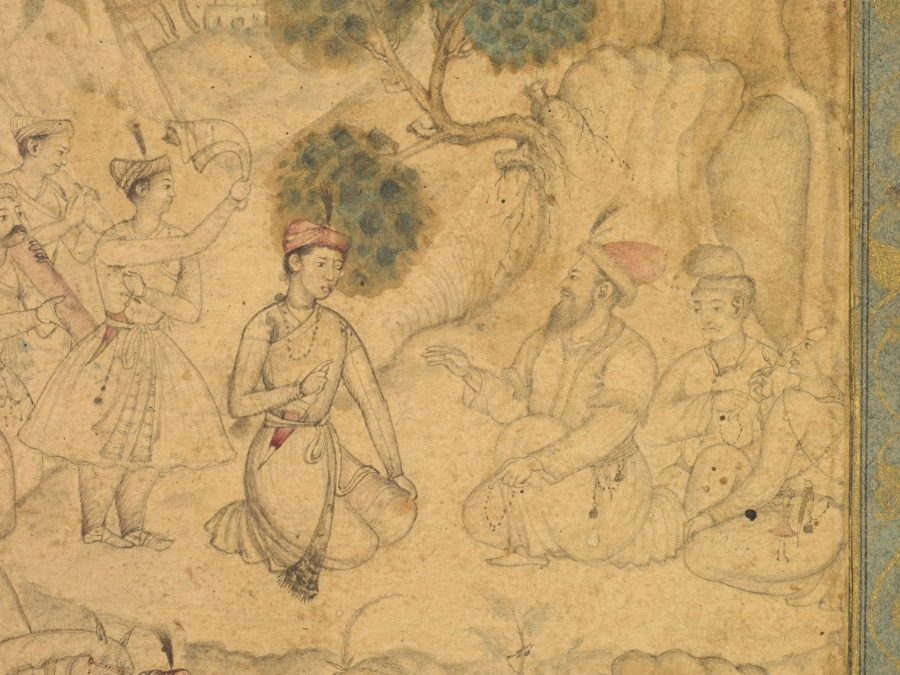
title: A Prince Visiting a Holy Man in a Rocky Landscape (recto)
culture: India, Mughal, 16th century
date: c. 1590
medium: Gum tempera, ink, and gold on paper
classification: Painting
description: A recurring theme in the art of India is the relationship between rulers and the religious practitioners who were believed to control supernatural forces that would aid in the success of rule and war. A prince has come to the abode of a Sufi mystic dervish, who sits with two acolytes in front of a rocky cave that may be his dwelling. The dervish appears to be blessing the prince and the weapons carried by his retinue to help assure success in an upcoming battle. In the foreground, a princely figure leading a horse meets surreptitiously with an eccentric figure holding a squat vessel, possibly filled with a narcotic substance such as bhang, used by many groups of mystics to aid in reaching trance states.